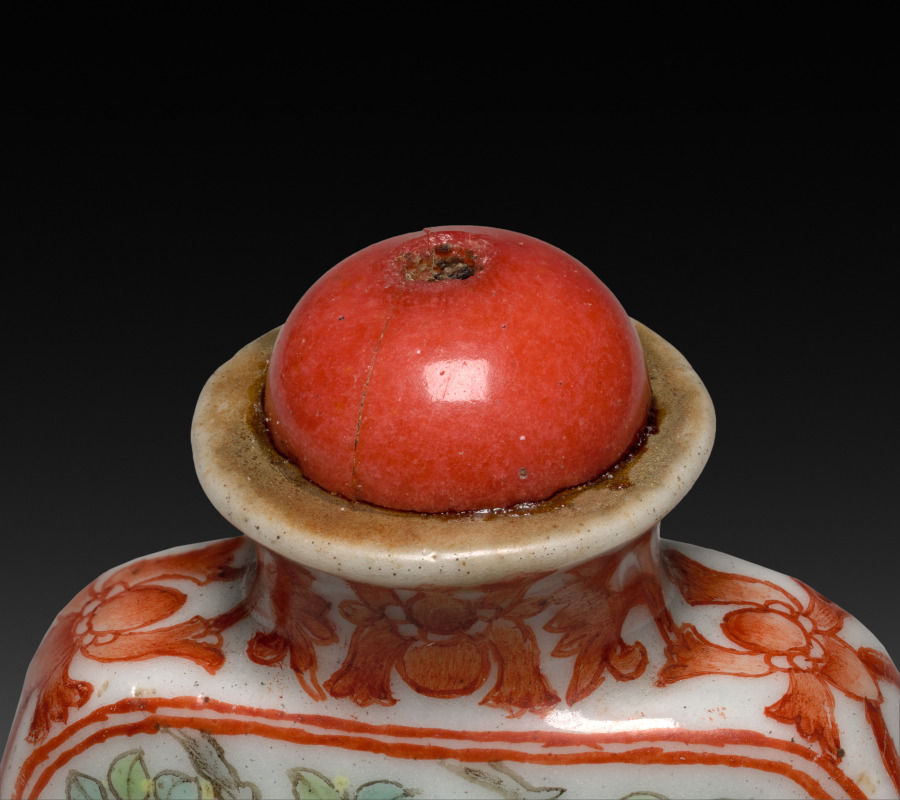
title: Snuff Bottle with Stopper (stopper)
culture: China, Qing dynasty (1644–1911), Qianlong reign (1736–95)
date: 1736–95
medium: porcelain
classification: Ceramic